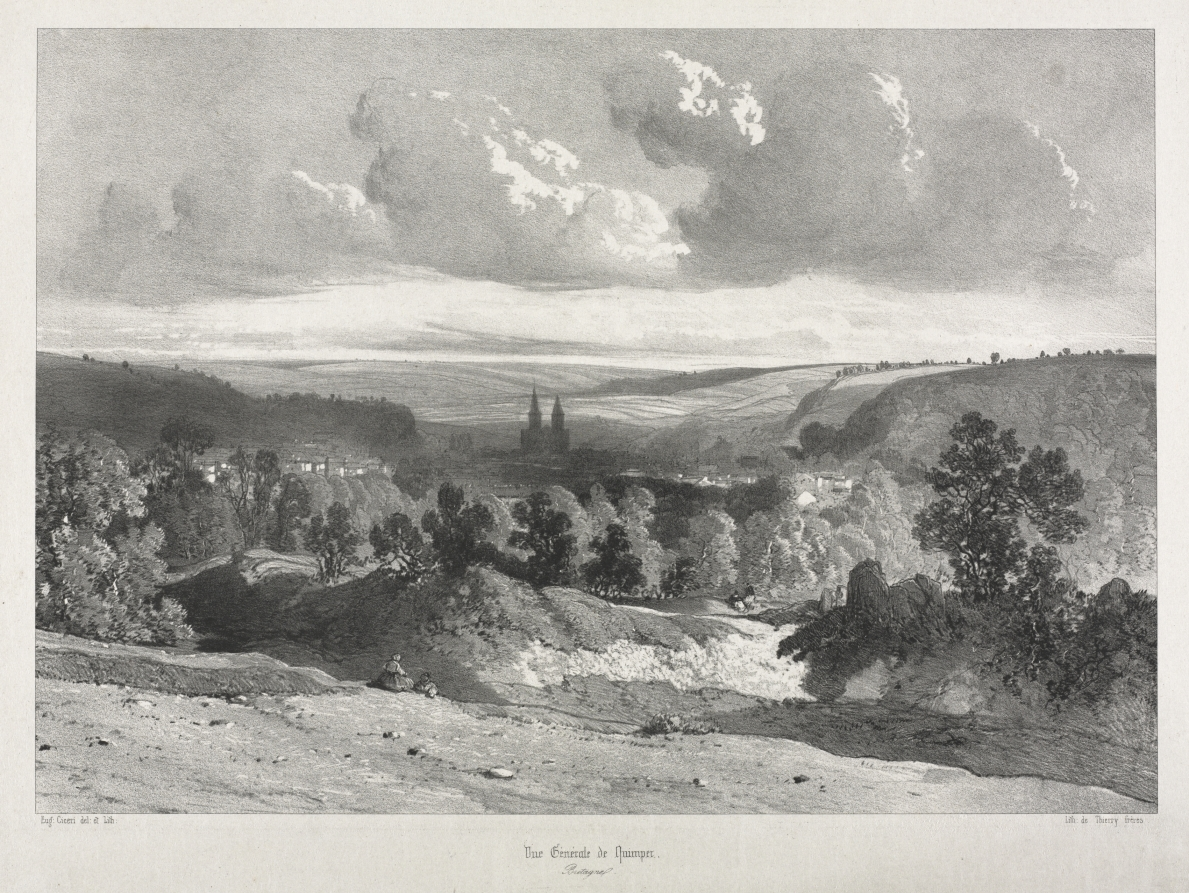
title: Voyages pittoresques et romantiques dans l'ancienne France. Bretagne: Vue général de Quimper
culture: France, 19th century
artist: Eugène Cicéri (French, 1813–1890)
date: c. 1845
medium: lithograph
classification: Print